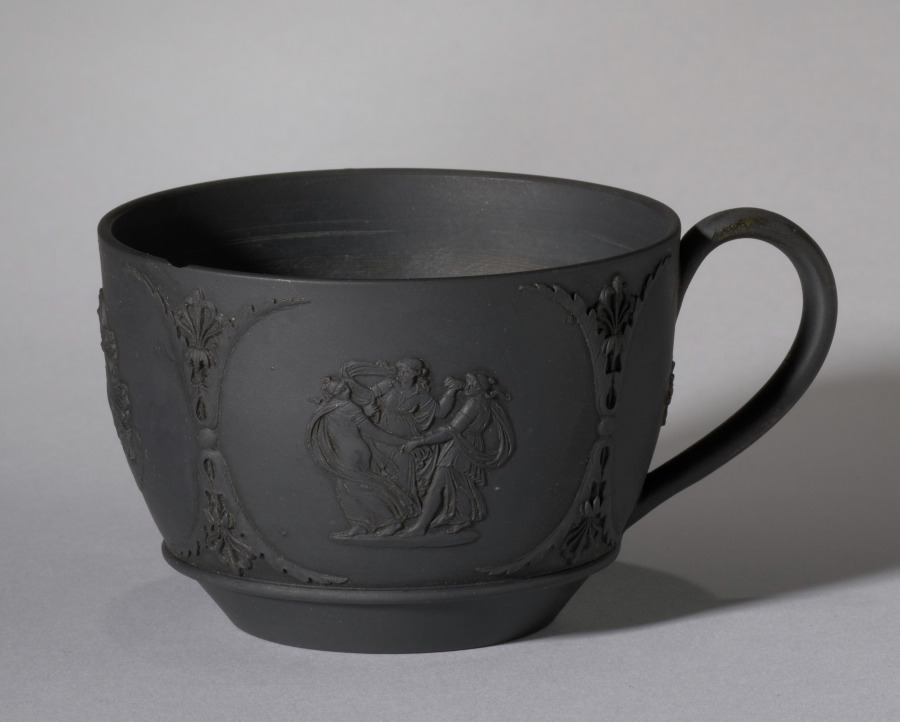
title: Cup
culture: England, Staffordshire, 19th century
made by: Wedgwood Factory (British)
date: 1800s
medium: black basalt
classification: Ceramic